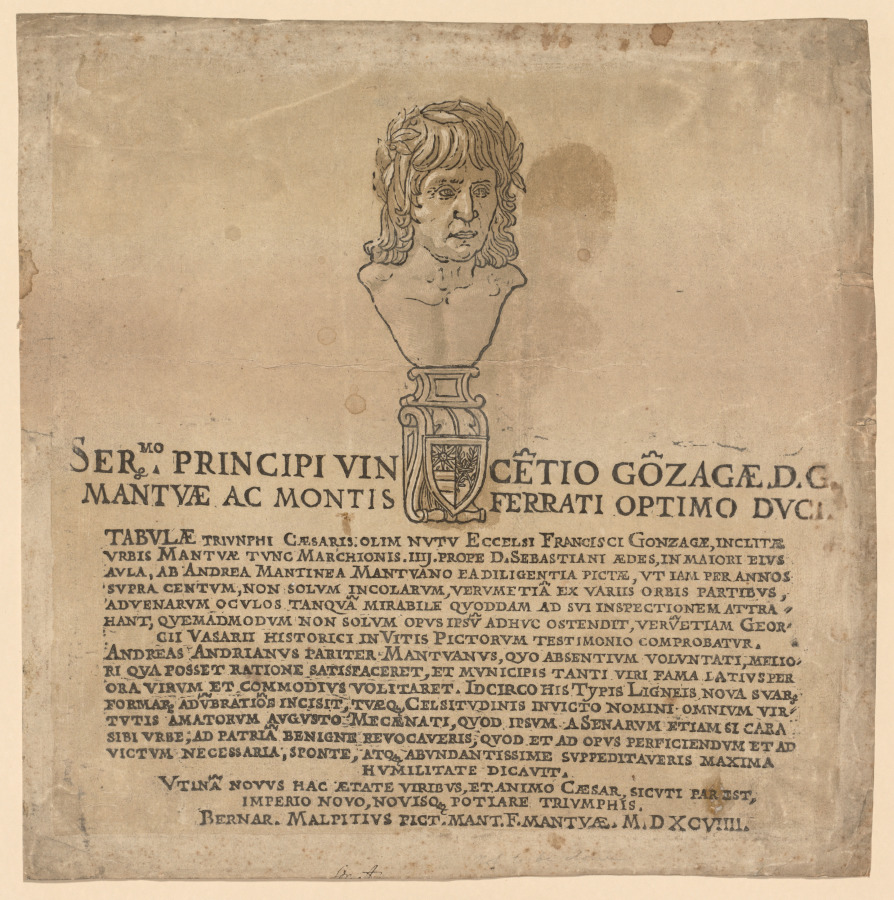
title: The Triumph of Julius Caesar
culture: Italy, 16th century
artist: Andrea Andreani (Italian, about 1558–1610)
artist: after Andrea Mantegna (Italian, about 1431–1506)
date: 1593–99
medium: chiaroscuro woodcut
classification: Print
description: Commissioned by Duke Vincenzo Gonzaga, this series of chiaroscuro woodcuts reproduces Andrea Mantegna’s Triumph of Julius Caesar, painted a century earlier. The scenes imaginatively portray the triumphal procession of the renowned Roman general and consul Julius Caesar following his successful defeat of Gaul in 52 BC. Each section of the continuous frieze shows elements typical of these parades, sanctioned by the Roman Senate and described in ancient texts. The printed suite’s frontispiece features a portrait bust of Mantegna, and the text below it boasts that the famous paintings attracted many viewers. People who owned sets of these woodcuts often tacked them up to create a decorative frieze. Andreani issued the prints with a sheet of classical columns that could be cut out and placed between the scenes. Two fragments of these columns, colored orange, still flank the fourth and ninth scenes.